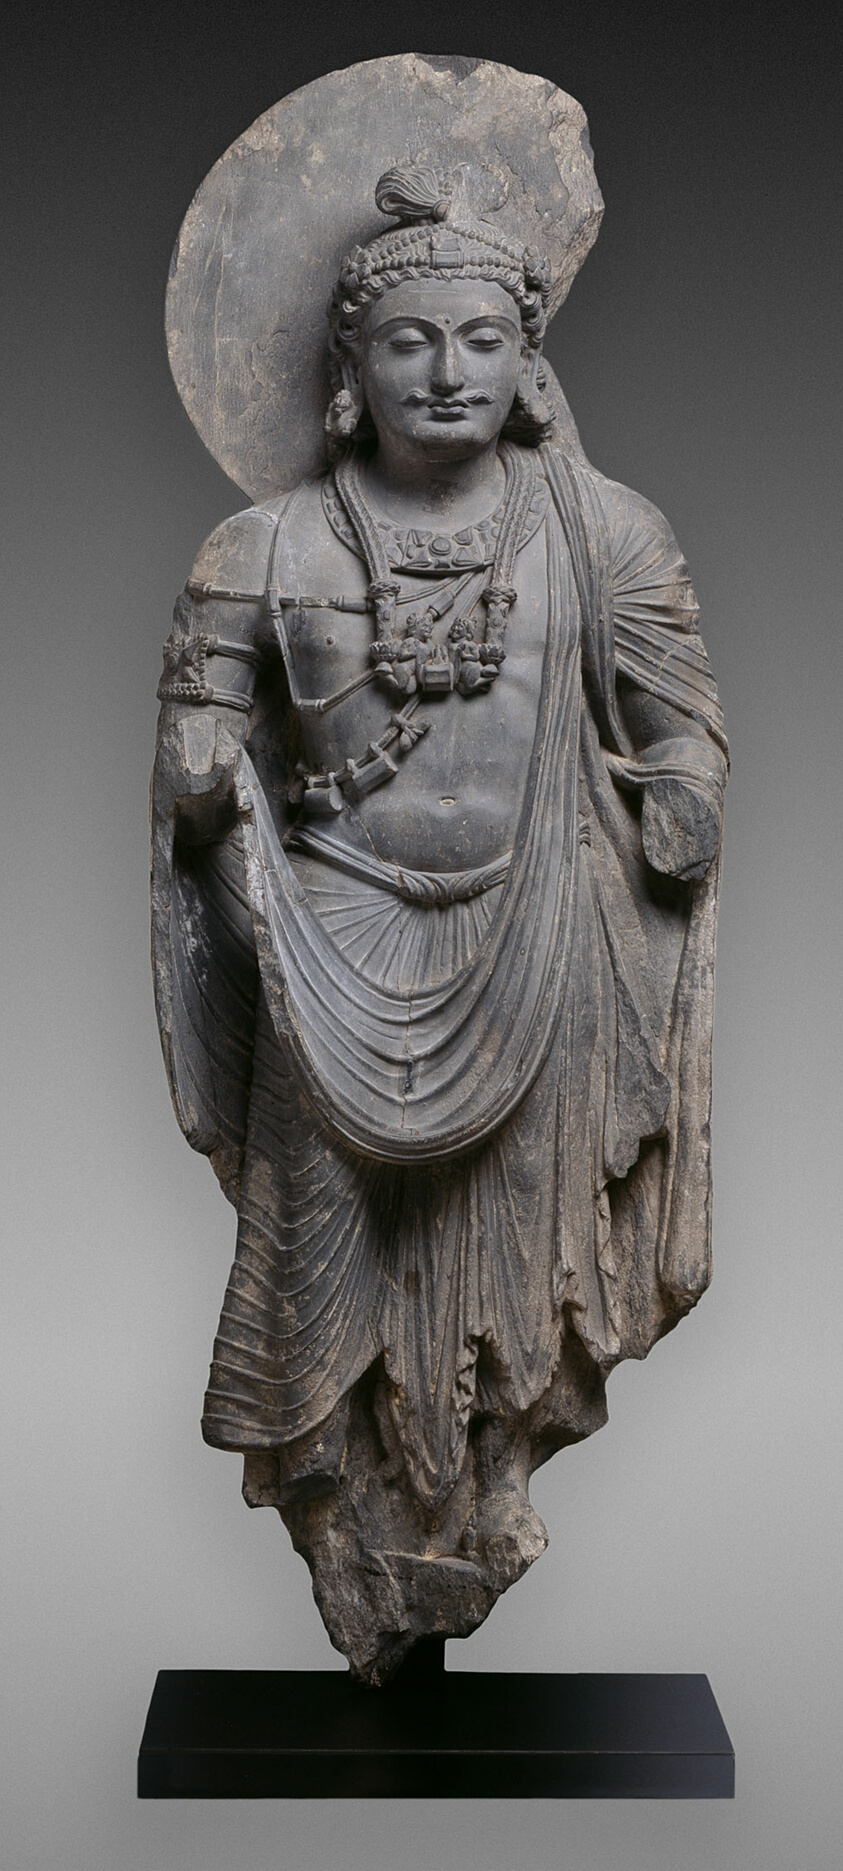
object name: Sculpture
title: Standing Bodhisattva with Human-Figure Necklace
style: South Asian, gandharan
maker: Pakistan; Ancient region of Gandhara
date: Kushan period, 2nd/3rd century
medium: Phyllite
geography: Gandhara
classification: schist; stone; sculpture; asian art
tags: religion, bodhisattva, Buddhism